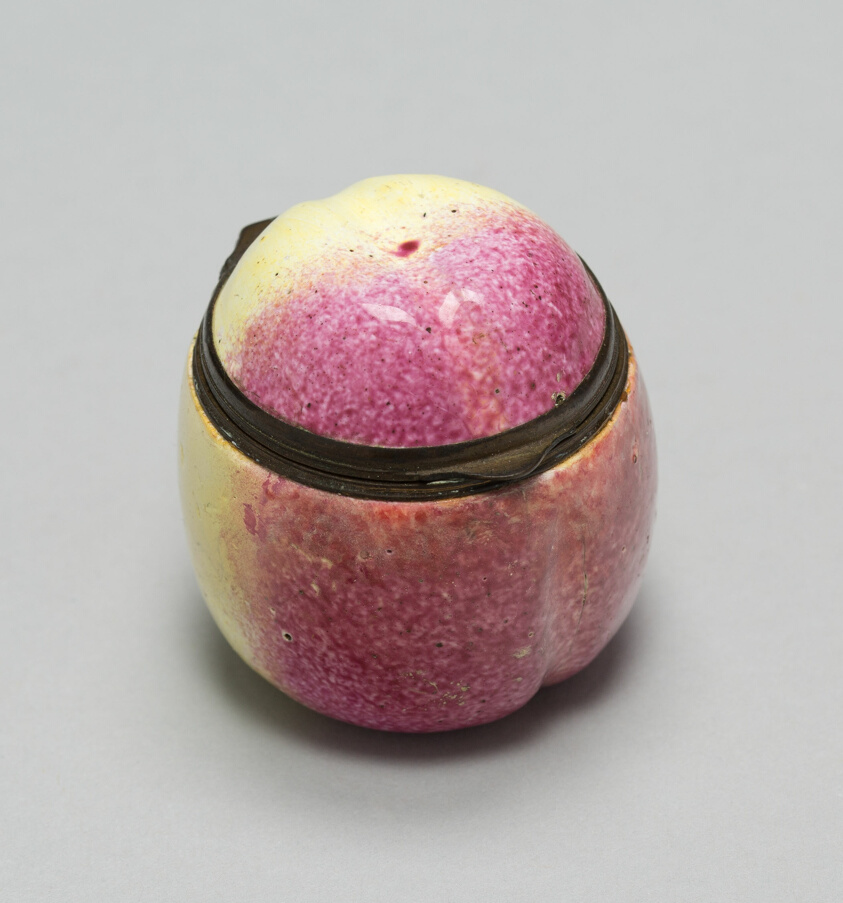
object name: Metalwork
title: Bonbonnière in the form of an Apple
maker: Bilston, England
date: 1780/1800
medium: Polychrome enamel on copper with metal mounts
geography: England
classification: enamel; metalwork